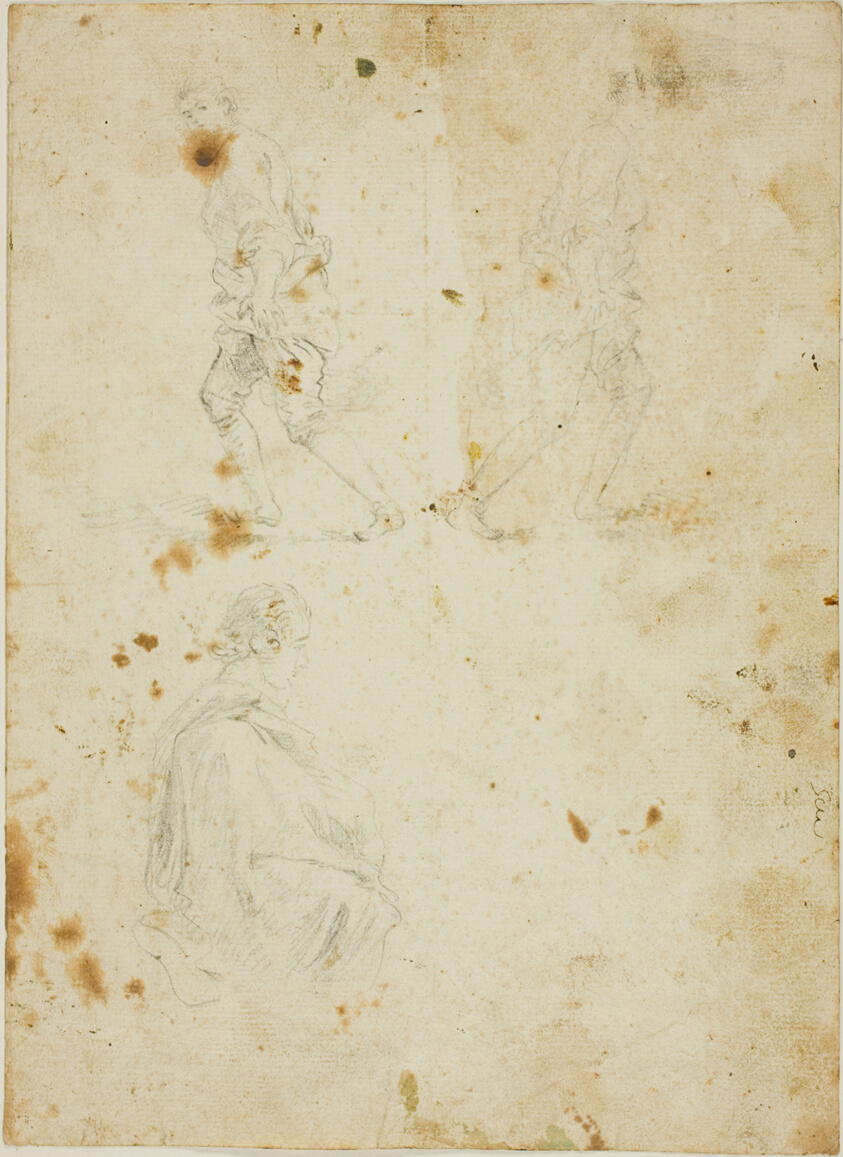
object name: Drawing and Watercolor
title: Studies of Male Figures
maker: Giovanni Paolo Panini (Italian, 1691-1765)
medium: Graphite with touches of black chalk, on cream laid paper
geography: Italy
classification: chalk; drawings (visual works); prints and drawing